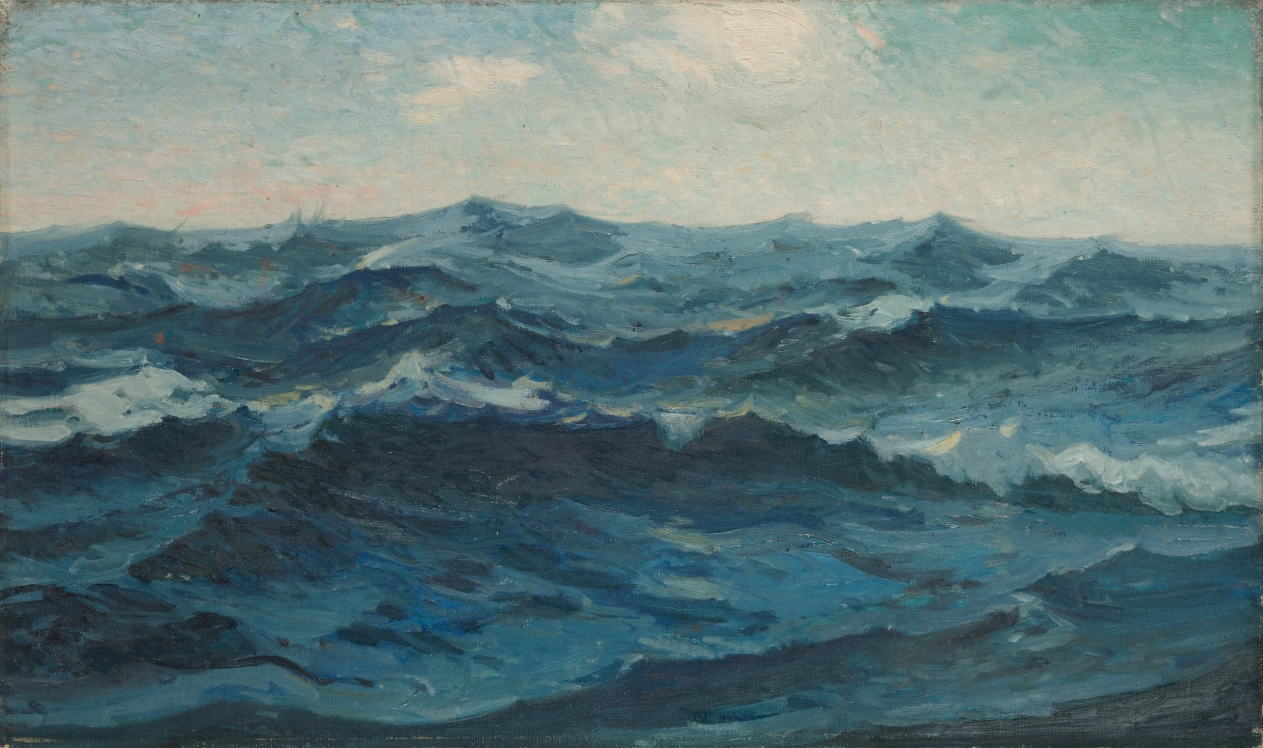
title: An October Day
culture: America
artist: Frank K. M. Rehn (American, 1848–1914)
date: before 1915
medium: oil on canvas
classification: Painting